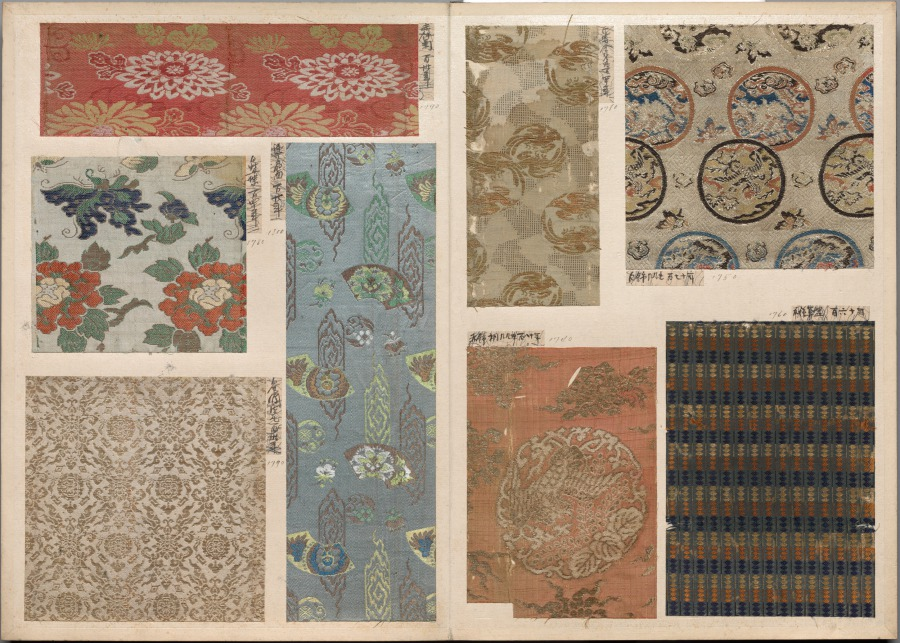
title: Album of Textile Samples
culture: Japan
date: 1790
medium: silk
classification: Textile